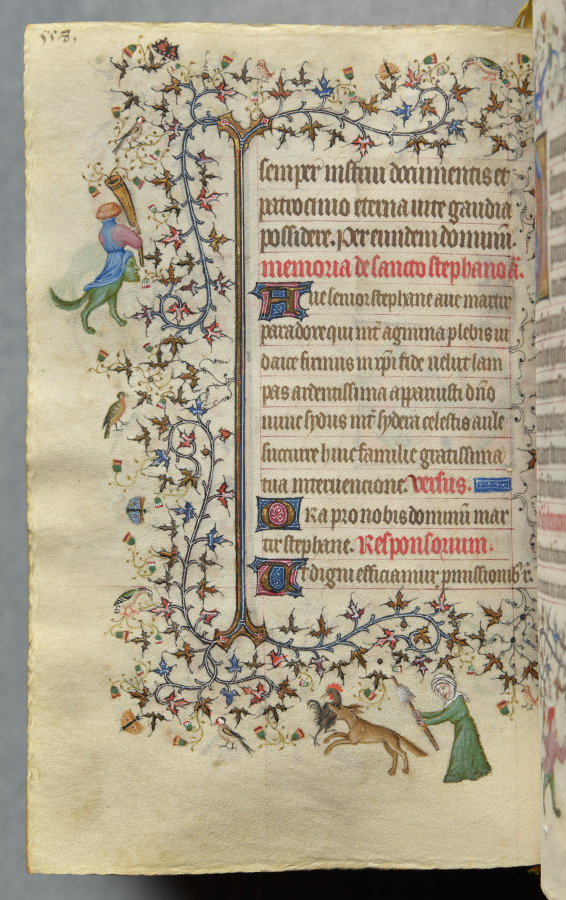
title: Hours of Charles the Noble, King of Navarre (1361-1425): fol. 273v, Text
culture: France, Paris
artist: Master of the Brussels Initials and Associates (French)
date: c. 1405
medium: ink, tempera, and gold on vellum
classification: Bound Volume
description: This precious volume was obviously highly prized by its owner, the French-born King of Navarre, who had his coat of arms painted on no less than twenty folios. Rather than directly commissioning this manuscript from a specific workshop, it seems that Charles the Noble acquired his book of hours -- perhaps ready-made for the luxury market -- while on a trip to Paris in 1404-05. A collaborative effort, six painting styles are evidenced within the pages of this codex, those of two Italians, two Frenchmen, and two Netherlanders. The painter who was responsible for the planning and decoration of the book, and who produced seventeen of the large miniatures, was a Bolognese artist known as the Master of the Brussels Initials. His principal assistant, responsible for most of the borders, was a Florentine who signed his name "Zecho" da Firenze on folio 208 verso.